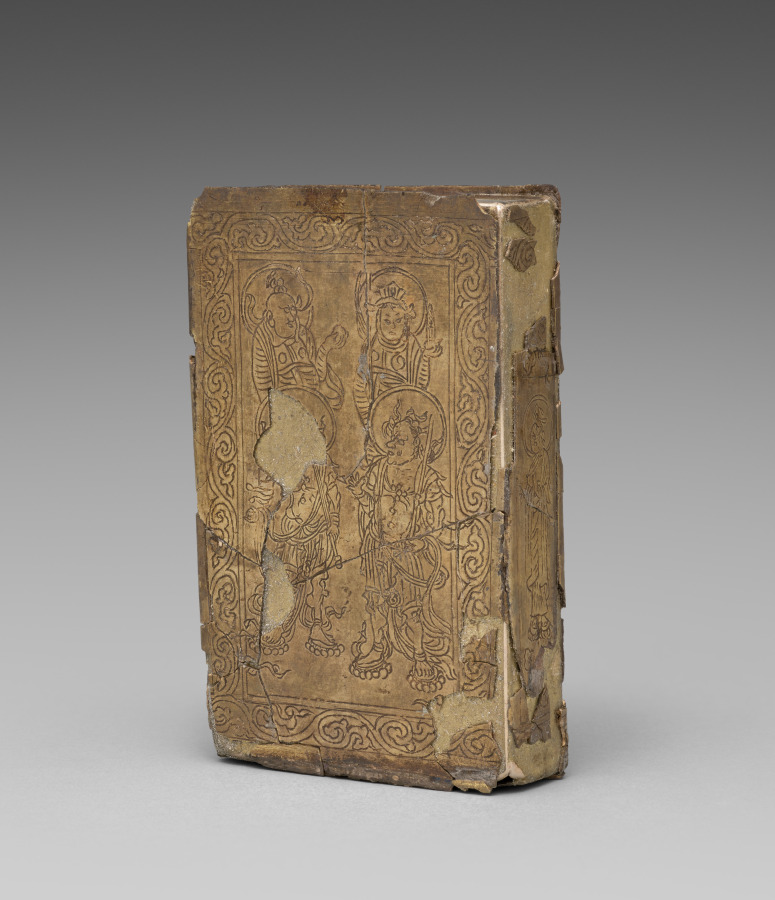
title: Buddhist Sutra Container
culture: Korea, Goryeo dynasty (918–1392)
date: 1100s-1200s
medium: gilt silver with incised Buddhist designs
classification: Metalwork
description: This container was designed to hold sutras, or Buddhist sacred texts. The Four Heavenly Kings, one for each of the cardinal directions, are incised on the exterior of the container. Images of the Four Heavenly Kings can often be found on Korean containers for sacred relics and sutras, and are symbolic of the wish to preserve the Buddha’s teachings.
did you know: This container was designed to hold a portable Buddhist sacred text.